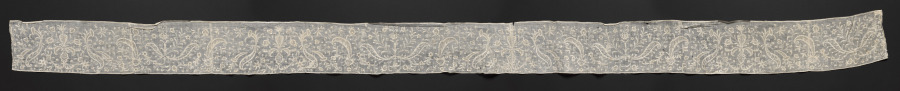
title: Band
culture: France(?)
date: 1700s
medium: Plain weave linen: needle lace (drawnwork) and embroidery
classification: Embroidery